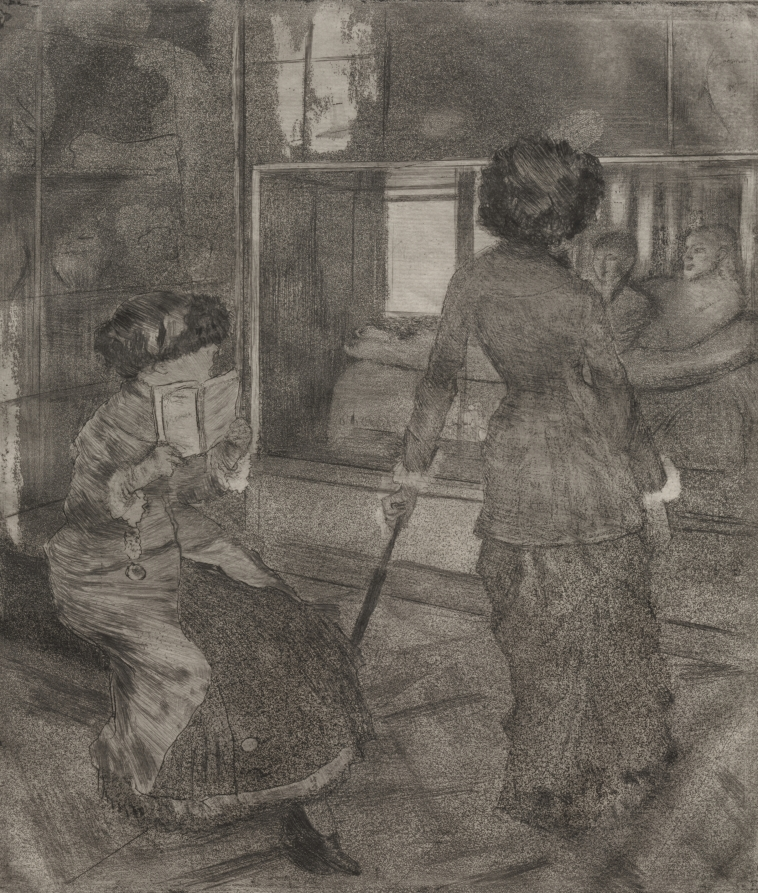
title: Mary Cassatt at the Louvre: The Etruscan Gallery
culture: France, 19th century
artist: Edgar Degas (French, 1834–1917)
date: 1879–80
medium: softground etching, drypoint, aquatint, and etching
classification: Print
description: This print is one of two in which Edgar Degas depicted Mary Cassatt and her sister Lydia at the Musée du Louvre. In this iteration of the subject, Casatt gazes intently at an Etruscan tomb, about 500 BC, excavated at Cerveteri, the largest ancient necropolis in the Mediterranean. Cassatt is viewed from behind while the enigmatically smiling couple, lying on top of a sarcophagus and enclosed in a glass case, face the viewer. Cassatt confronts the sculpture directly while Lydia reads about it in a guidebook.